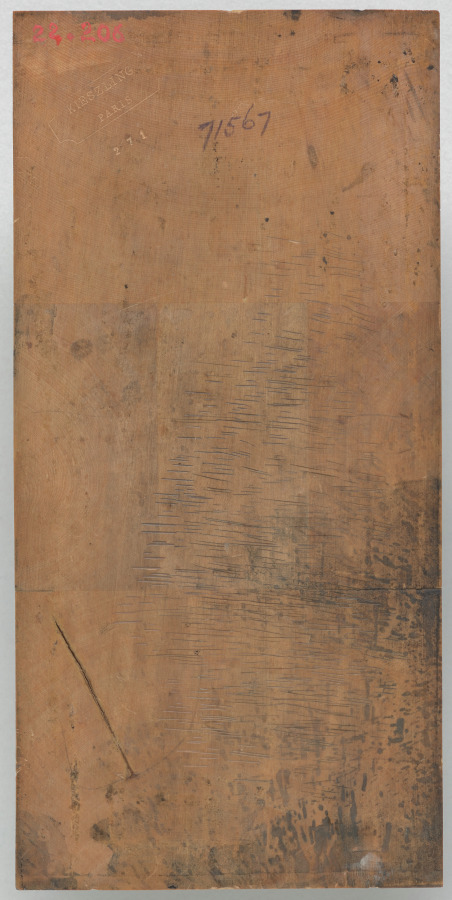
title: Quai des Grands Augustins, Paris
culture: France, 19th-20th century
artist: Auguste Louis Lepère (French, 1849–1918)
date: 1886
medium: woodblock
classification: Woodblock